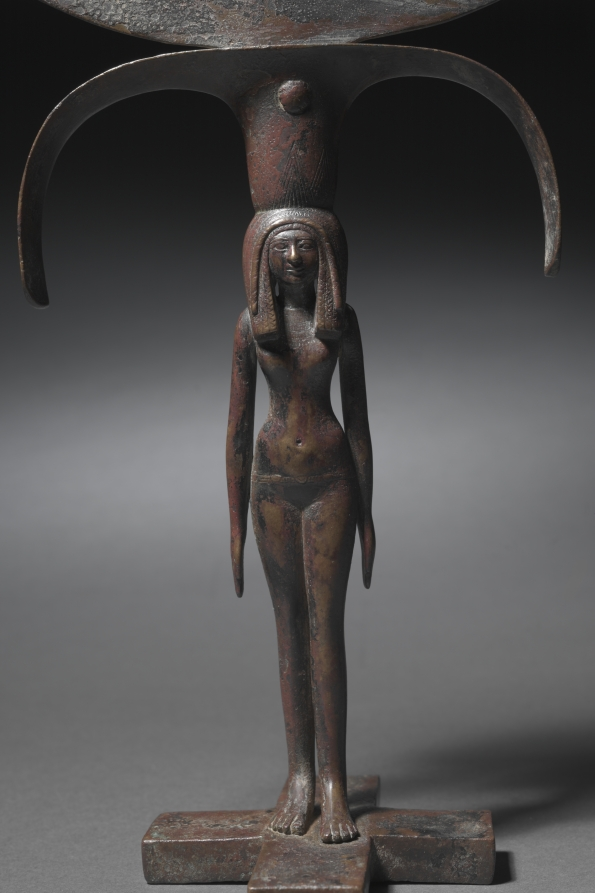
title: Caryatid Mirror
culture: Egypt, New Kingdom (1540–1069 BCE), Dynasty 18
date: c. 1540–1296 BCE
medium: bronze with black copper inlay?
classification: Cosmetic Objects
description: This superb mirror has an oval disk and a handle in the form of a nubile young girl, entirely naked except for her elaborately braided tripartite wig, broad collar, and a girdle of wallet beads. She stands on a cruciform base, with her left foot slightly advanced and her hands at her sides. On her head and supporting the disk is a papyrus umbel with flaring tips. Mirrors with handles in the form of naked young girls were the height of fashion in mid-Dynasty 18; numerous examples exist. This mirror is perhaps the finest of its kind. The cruciform base is unusual, if not unique. The iconography is understandable in relation to the goddess Hathor, the embodiment of love and beauty. A multifaceted goddess, she was equated with Aphrodite by the Greeks. The retinue of Hathor consisted precisely of such beauties, called nefrut in Egyptian, and the mirror itself, that reflection of beauty, appears to have had Hathorian connections from early times.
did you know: When they were made, this mirror was polished to a brilliant shine; the marvelous colored patina it has since acquired is the result of being buried for years in the ground.